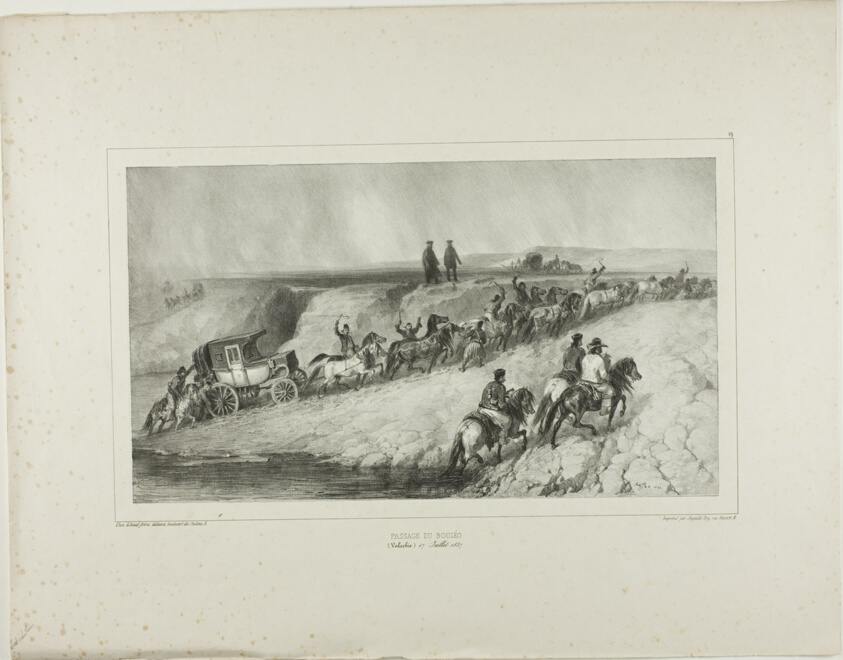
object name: Print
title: Bouzeo Passage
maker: Denis Auguste Marie Raffet (French, 1804-1860); printed by Auguste Bry (French, 19th century); published by Chez Gihaut Frères (French, 19th century)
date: 1839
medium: Lithograph in black on ivory chine laid down on ivory wove paper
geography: France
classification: lithograph; print; prints and drawing